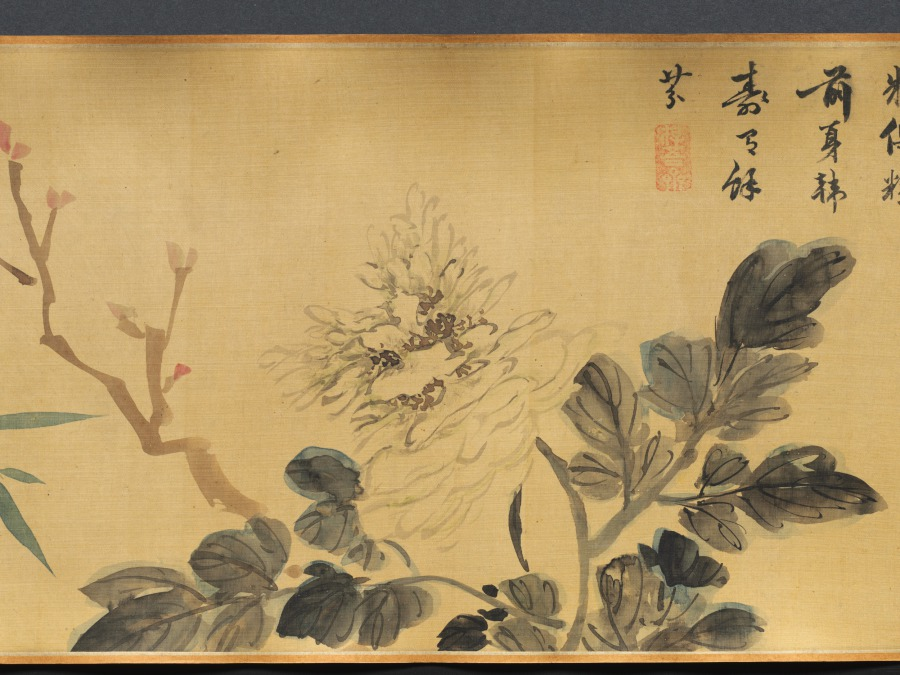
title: Flowers of Four Seasons, with Poems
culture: China, Ming dynasty (1368–1644)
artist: Wang Guxiang (Chinese, 1501–1568)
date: 1531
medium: handscroll; ink and light color on silk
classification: Painting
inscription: Artist's inscription, signature, and 15 seals. Ink Orchids. Sewn as pendants for the man of worth, swaying quiety, fragrance in the valley. [seal] Hsiao-chu ts'un Peony. Wiping his face, the young gentleman Ho [Ho Yen of Wei, Three Kingdoms] appears to have been powdered. His previous life was the perfume-stealing Han Shou [of Chin, 265–419 CE], the fragrance still lingers. [seal] Ts'un-wu chai. Flowering Crab Apple, New Bamboo. Shao-lin [Du Fu, 712–770] had to put down his brush. [Flowering Crab Apple]. Yü-k'o [Wen T'ung, d. 1079) in vain wrote poems about [Bamboo]. [seal] Yu-shih. Lotus Flowers. When she turns her head, half-hidden by a fan, and casts a glance, all the beautiful women become colorless. [seal] K'ang yüeh huai. Loquat. Ripeness in summer. [seal] Lu-chih. Pomegranate Flower. Whenever I remember you I will send my thoughts, but where have you gone--the [skirt] of pomegranate red? [seal] Wu-ho Sheng. Day Lily. Plant the day lily to forget sorrow. [seal] Yu-shih. Chrysanthemum. The untrammelled joy at the eastern fence. [seal] Lu-chih. Begonia. Comparing it to the beauties of Spring, and spreading them out as trimming for the stone steps. [seal] Yu-shih. Hibiscus. In recent years I have always enjoyed looking at flowers; instead of dark red I preferred pink ones. [seal] Jen-sheng i-lou. Narcissus, Camellia. The jade girdle left behind at Lo River. [Narcissus]. The precious pearls glitter before Spring. [Camellia]. [seal] Lu-chih. Heavenly Bamboo (Nandina domestica). A single branch in the wintry season. [seal] K'ang yüeh huai. Plum. Fragrant snow in the Lo-fou Mountains. [seal] Ts'un-wu chai. In the eleventh lunar month of the hsin-mao year of the Jiaqing era [1531], [I] imitated the boneless style of Yüan masters in sketching from life. Guxiang [seals] Yu-shih; Lu-chih. Translated by Wai-kam Ho/Lingyun Shih Liu (1980)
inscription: 2 colophons and 23 additional seals: 1 colophon dated 1632, and 2 seals of Li Jih-hua [Li Rihua] 李日華 (1565–1635); 1 colophon and 2 seals of Xiang Shengmo 項聖謨 (1597–1658); 3 seals of Liang Qingbiao 梁清標 (1620–1691); 6 seals of the Jiaqing 嘉慶 emperor (r. 1796–1820); 9 seals of Ch'eng Ch'i [Cheng Qi] 程琦 (1911–1988)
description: In this painting, flowers are loosely arranged by the seasons: narcissus and peony represent early spring; yellow loquat and lotus, summer; chrysanthemum, autumn; and the plum and evergreen bamboo, winter. The artist added to each flower a poetic line of calligraphy associating each plant with a historic or legendary figure. For example, the chrysanthemum, along with the line “The untrammeled joy at the eastern fence,” refers to the poet Tao Yuanming (died AD 427) who enjoyed chrysanthemums at the eastern fence in his garden. The scroll illustrates Wang Guxiang’s mastery of free brushwork, combining light monochrome ink with transparent colors. In his inscription, Wang says he used the “boneless” style without outlines as developed during the Yuan dynasty (1279–1368). Wang was a native of Changzhou, a city in southeast China known for its rich flora and fauna, and flower-and-bird painting tradition.